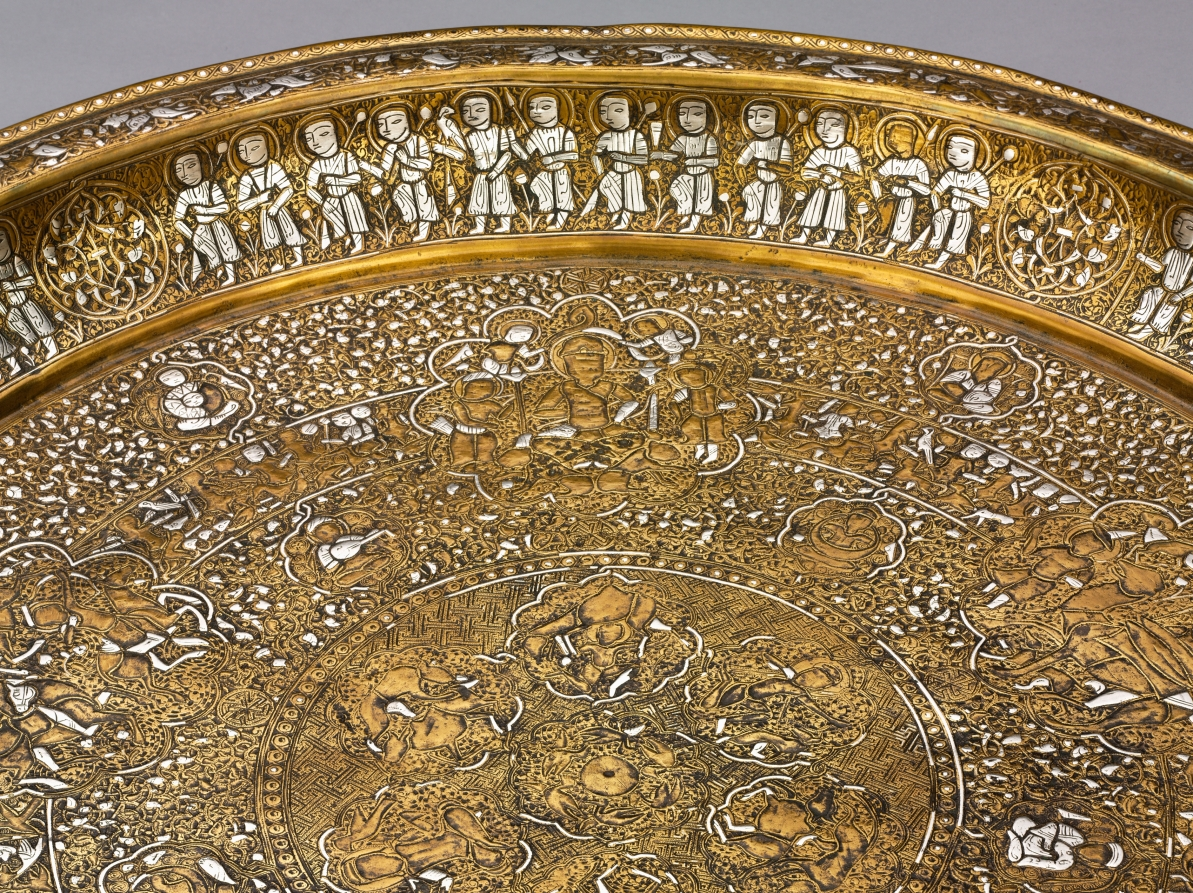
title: Tray Portraying Courtly Pleasures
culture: Syria, Ayyubid period (1171–1260)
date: 1240s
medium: sheet brass inlaid with silver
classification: Metalwork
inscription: The presence of ligatures in the narrow circular bands with interconnected human and animal figures suggests this may be a degenerate form of animated script. It is indecipherable.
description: This tray features images of courtly life interspersed with astronomical symbols. The scenes contained within large multilobed medallions display an enthroned prince with lions at his feet, a banquet, a hunt, dancers, and musicians. Contained within the concentric circles there are also references to solar and lunar motifs, including figures holding sunbursts and lunar crescents. This tray is made of a single sheet of brass and the silver inlay, which is best preserved on the tray’s inner curve, suggests its original brilliance.